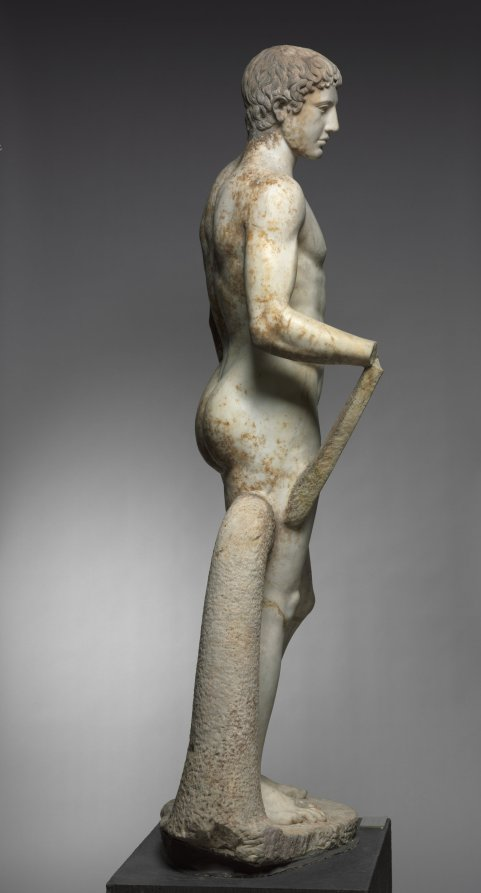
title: Statue of an Athlete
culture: Italy, Roman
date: 1–100 CE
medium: marble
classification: Sculpture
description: This idealized athlete recalls Greek sculptural types invented and popularized during the 400s BC. Large-scale athletes and other sculptures like this were originally created by famous artists as sanctuary dedications. Centuries later, they were widely copied and adapted by Roman sculptors, whose clients sought their own versions of earlier masterpieces. Working in marble rather than bronze, these sculptors added certain elements for stability, such as the struts and the large tree trunk beside the right leg here. Sculptures like this one are profoundly complex, made by and for Romans but descended from Greek ancestors.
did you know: For many years, this sculpture stood in the rotunda of the Cleveland Museum of Art.